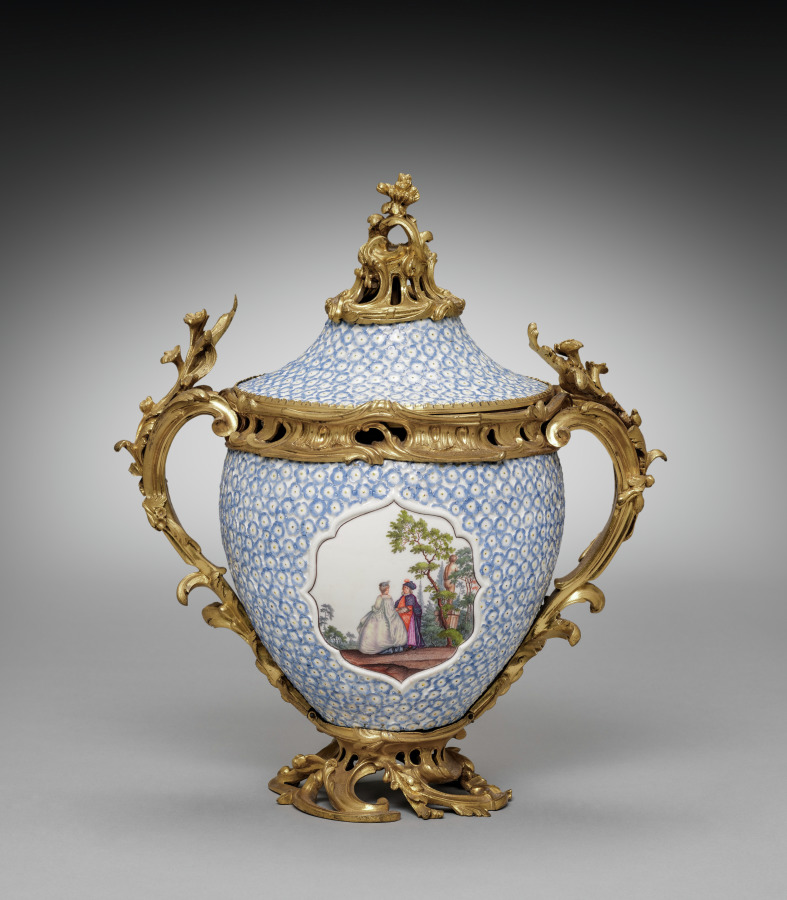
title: Covered Vase (1 of 2)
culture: Germany, 18th century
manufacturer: Meissen Porcelain Factory (German, est. c. 1710)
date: 1749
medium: porcelain mounted in gilt bronze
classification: Ceramic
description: One of these vases is dated 1749. They were perhaps part of a set of four covered vases that we know from documents were acquired by Mme. de Pompadour, mistress of Louis XV in 1752.